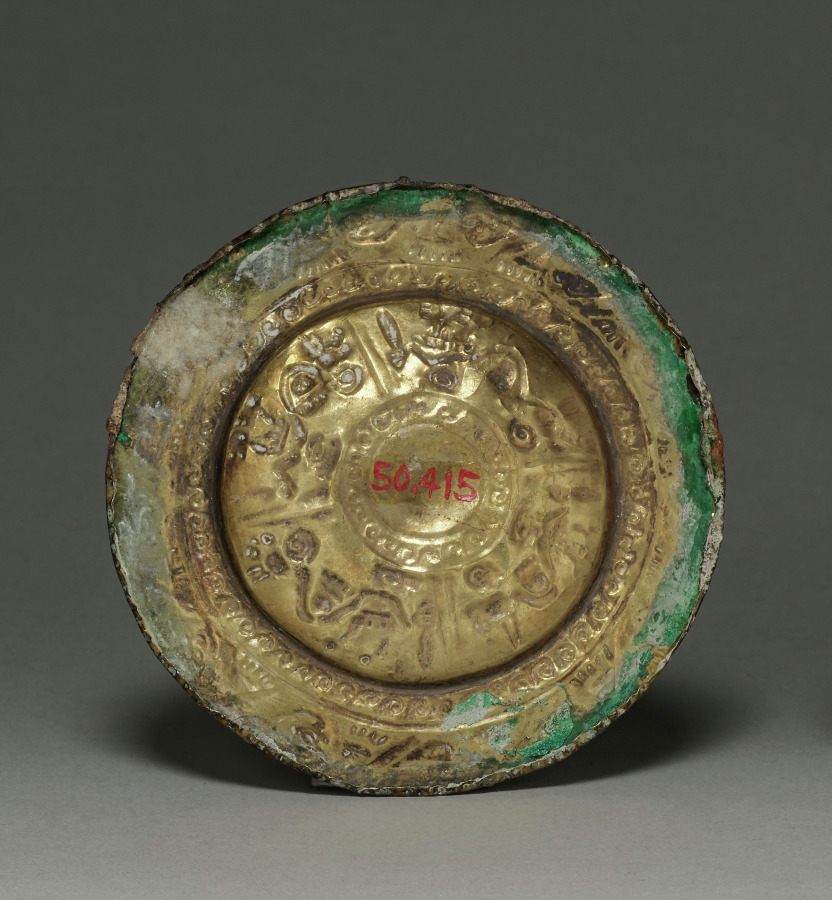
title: Ear Ornament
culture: Peru, North Coast, Sicán, 9th-14th century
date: c. 800–1370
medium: hammered and embossed gold alloy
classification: Metalwork